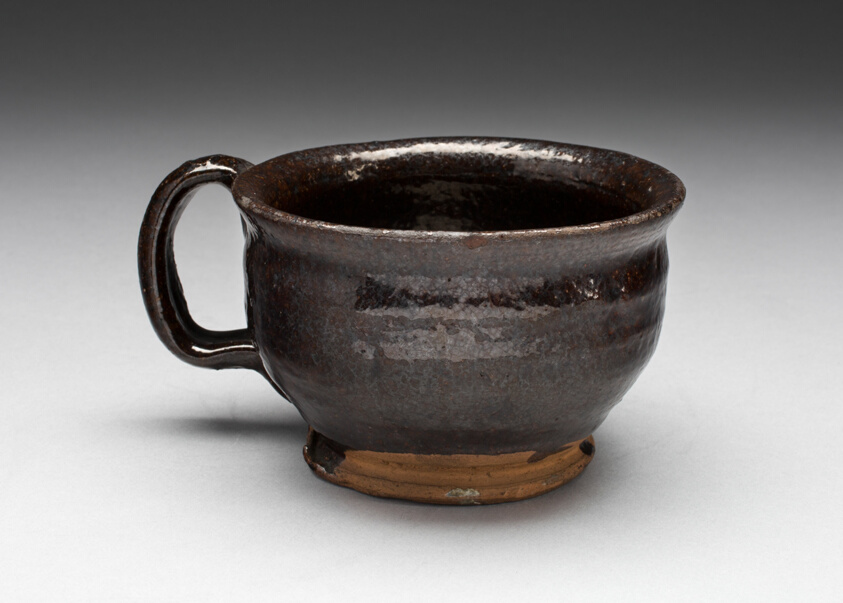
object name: Decorative Arts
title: Mug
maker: Artist unknown (American, 19th century); Pennsylvania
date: 1820–60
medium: Earthenware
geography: Pennsylvania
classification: drinking vessel; american decorative arts; american arts; ceramics; decorative arts